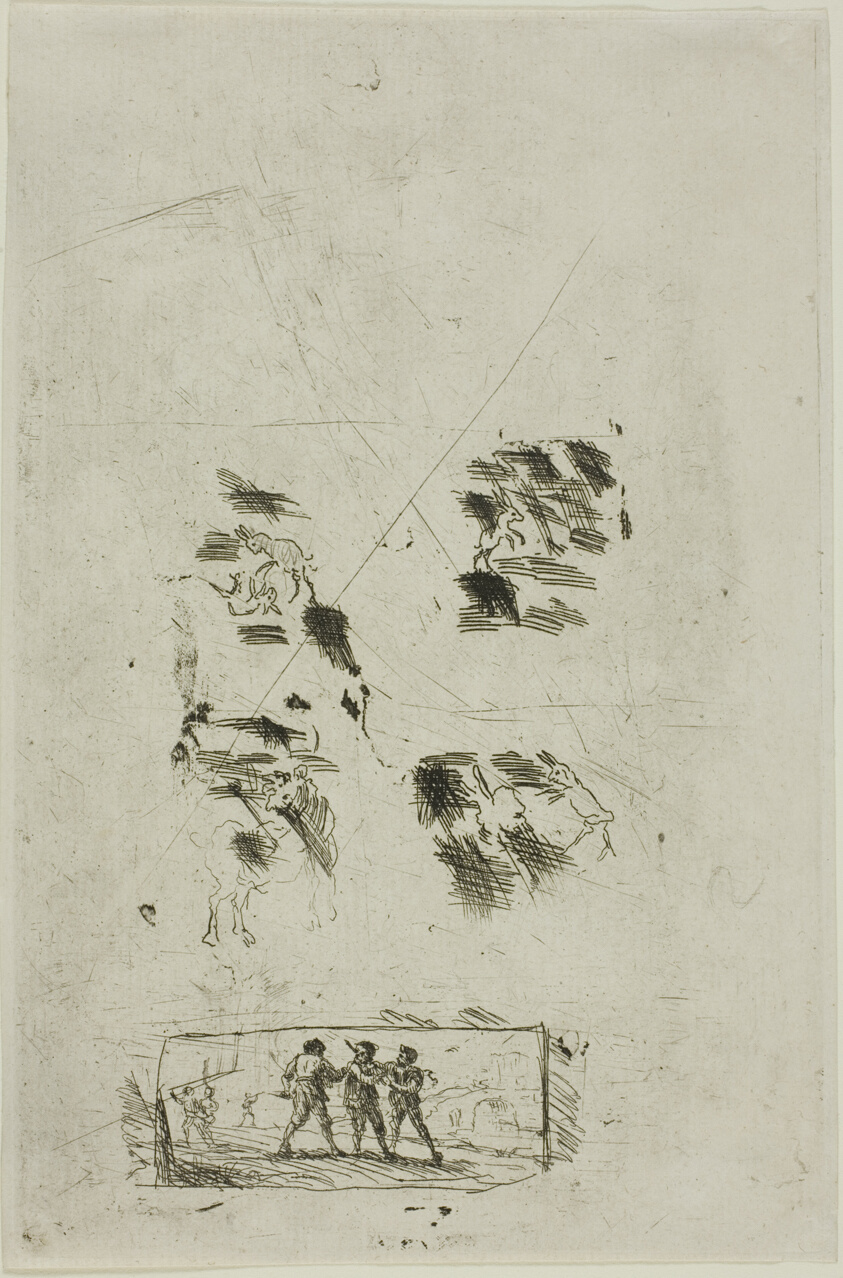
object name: Print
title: Study for a Scene with Brigands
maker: Claude Lorrain (French, 1600-1682)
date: c. 1633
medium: Etching on ivory laid paper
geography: France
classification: etching; print; prints and drawing